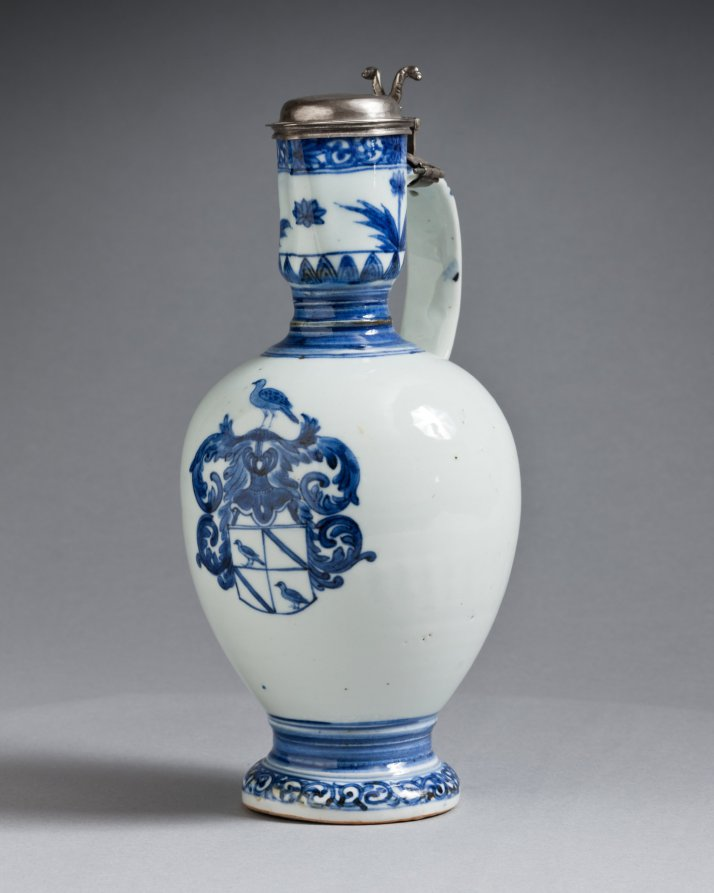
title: Jug with Silver Mounts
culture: Japan, Edo period (1615–1868)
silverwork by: Barent van Leeuwen (Dutch, 1637–1682)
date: c. 1662–76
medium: porcelain with underglaze blue decoration and silver mounts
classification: Ceramic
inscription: [on silver]: town mark for Amsterdam; lion rampant crowned (alloy mark for 0-934 silver); d (date letter for 1666), maker's mark of Barent van Leeuwen.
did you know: The coat of arms on this jug are those of the Valckenier family, active in the Dutch East India Company.